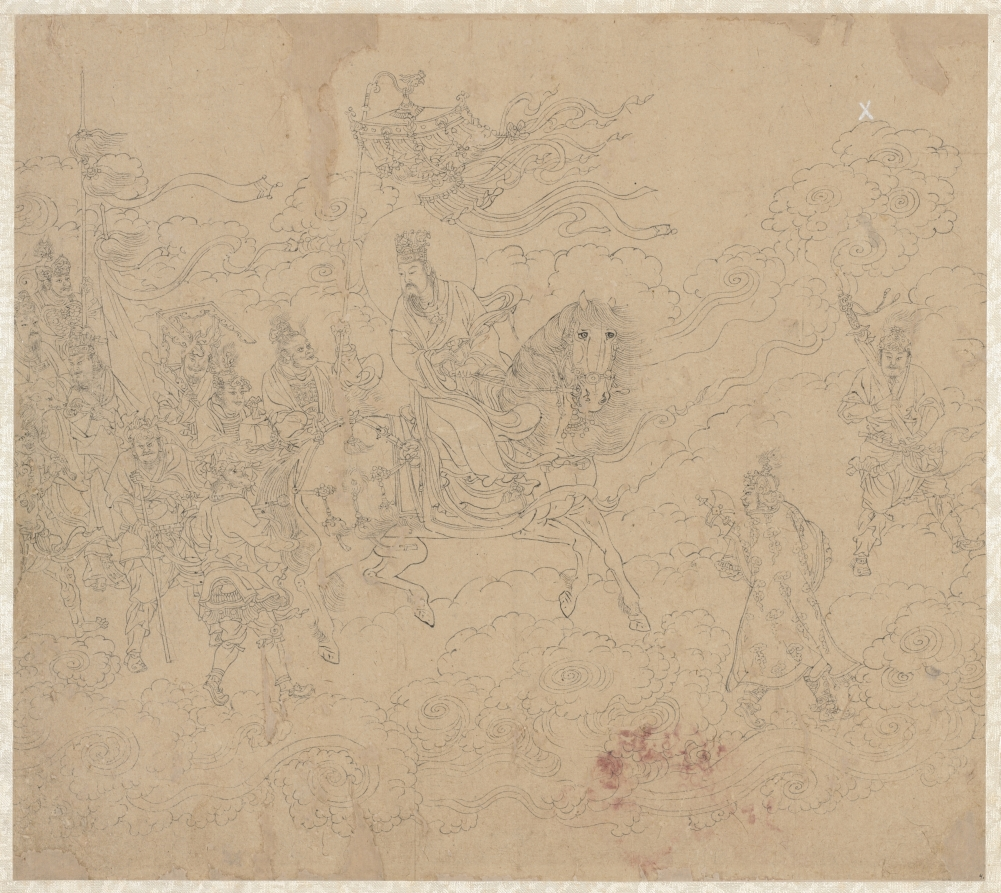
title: Album of Daoist and Buddhist Themes: Procession of Daoist Deities: Leaf 4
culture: China, Southern Song dynasty (1127-1279)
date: 1200s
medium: album, ink on paper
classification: Painting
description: Leaf 4 depicts one of the sanguan 三官大帝 (Three Officials of Heaven, Earth, and Water) in the Daoist pantheon. These "officials" work as intermediaries between human beings and the bureaucracy of the netherworld. This deity, riding on a lively steed, most likely represents the "Official of Earth" 地官. Leading the way, his entourage includes a host of protective guards who carry his sword and chair, hoist his parasol and flags, or simply hold their own weapons. These figures all walk on clouds, moving along with a strong wind that causes the parasol and flags to flutter, creating a sense of overall motion.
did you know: A demonic figure on the far left of the entourage is carrying a hunting dog on his shoulder.